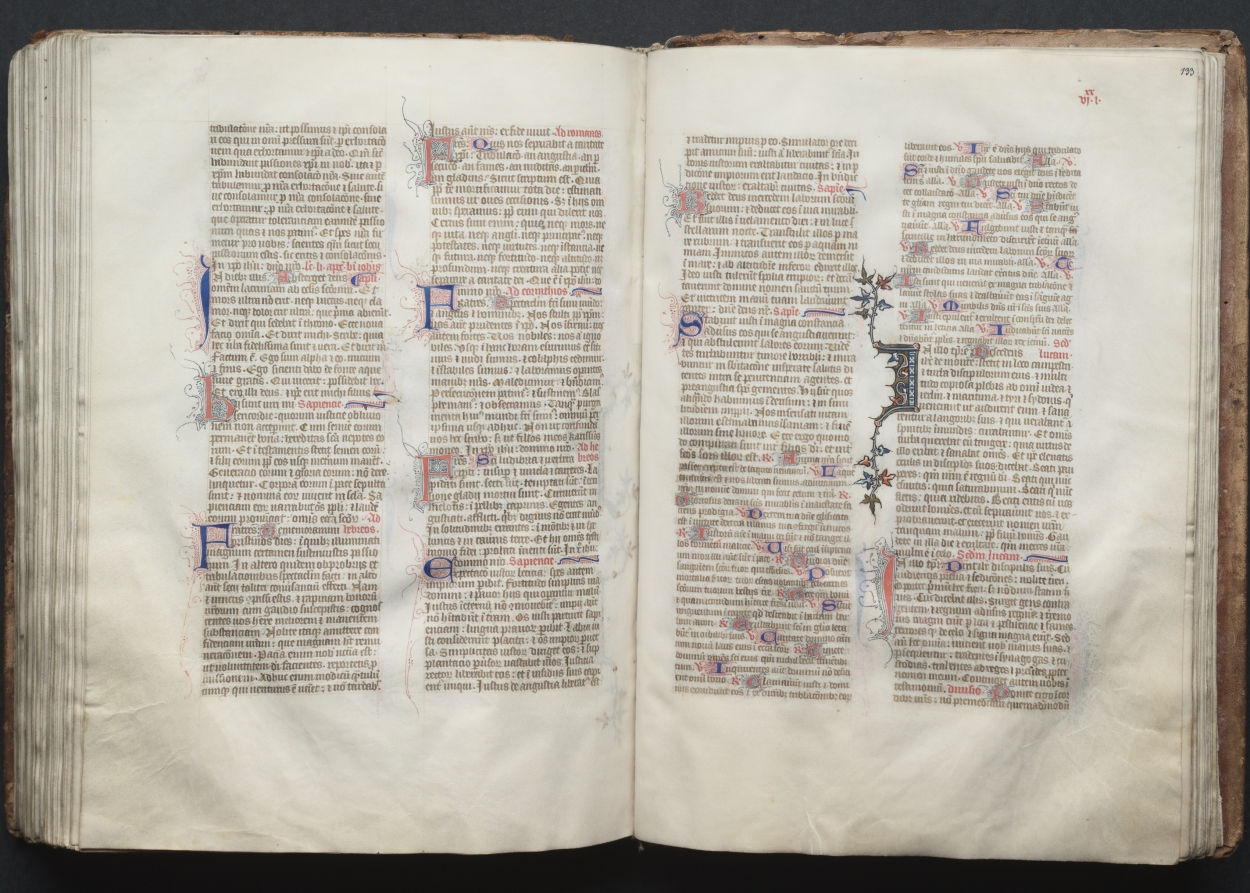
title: The Gotha Missal: Fol. 132v, Text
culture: France, Paris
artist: Master of the Boqueteaux (French)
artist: and Workshop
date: c. 1375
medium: ink, tempera, and gold on vellum; blind-tooled leather binding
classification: Bound Volume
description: The style and quality of this manuscript's decoration is typical of deluxe Parisian books made for aristocratic or royal patrons. Most of the book's decoration appears to be the work of the Master of the Boqueteaux, an artist active at the court of King Charles V (died 1380). His style was apparently shared by a number of book illuminators working in and around Paris. It is very possible that the Gotha Missal belonged to Charles V, but is not provable because the manuscript has no royal portraits and lacks a colophon. Given the book's magnificent decoration, however, it would seem that it was produced for a Valois prince, if not for the king himself. The manuscript receives its name from the German dukes of Gotha, its later owners.